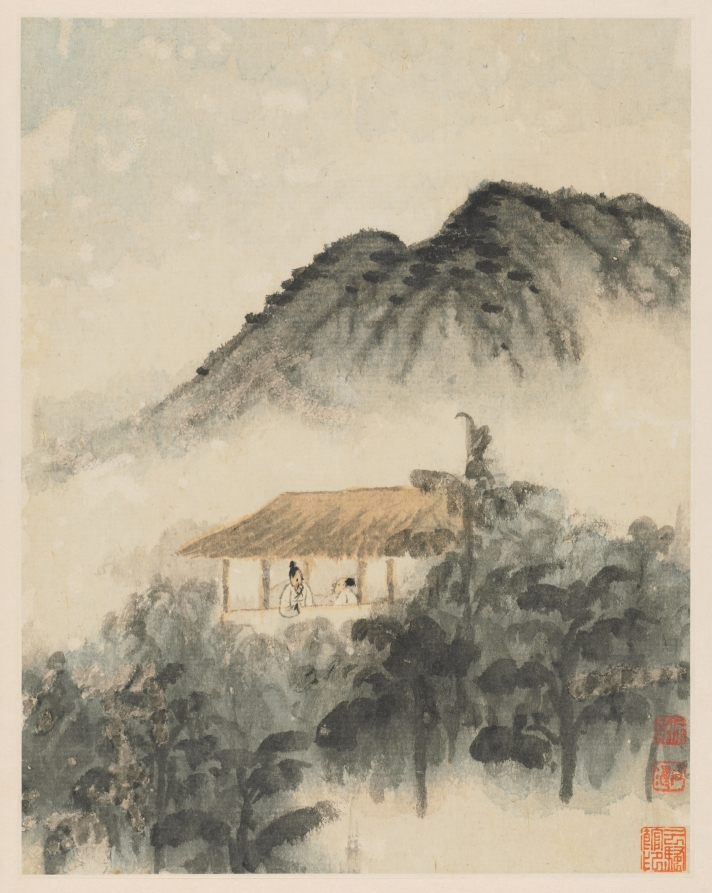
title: Reminiscences of Qinhuai River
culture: China, Qing dynasty (1644-1911)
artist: Shitao (Chinese, 1642–1707)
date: 1642–1707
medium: album leaf, ink and color on Song paper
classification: Painting